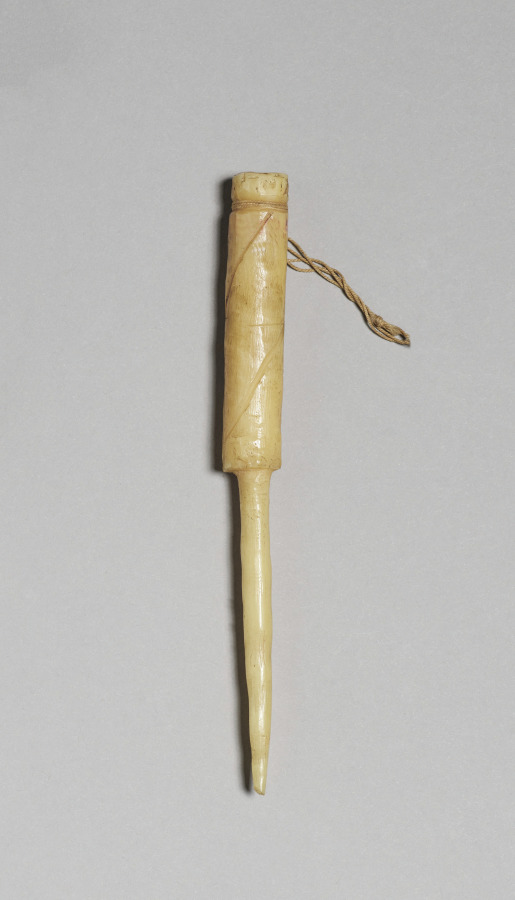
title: Bone Awl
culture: America, Native North American, Gaigwu (Kiowa), late 19th century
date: late 1800s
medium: bone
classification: Implements